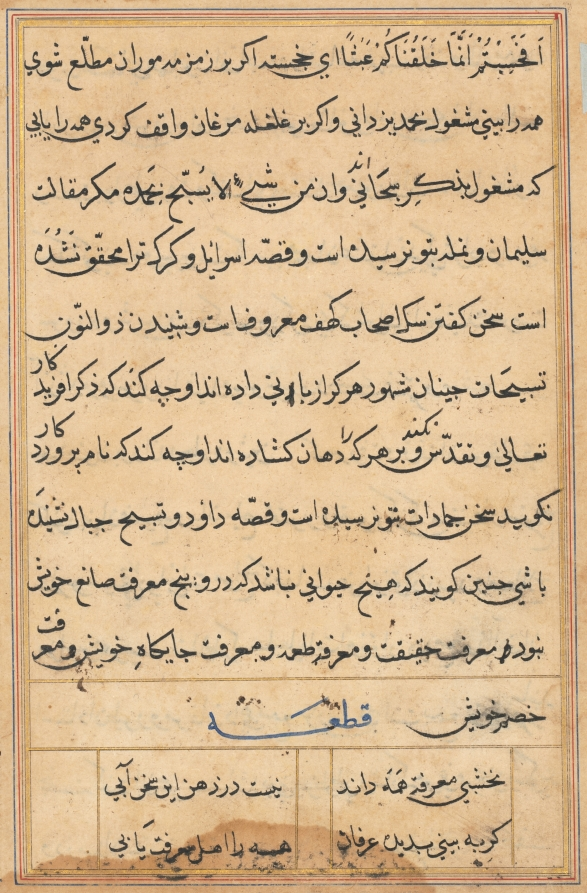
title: Page from Tales of a Parrot (Tuti-nama): text page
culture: Mughal India, court of Akbar (reigned 1556–1605)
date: c. 1560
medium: gum tempera, ink, and gold on paper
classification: Painting